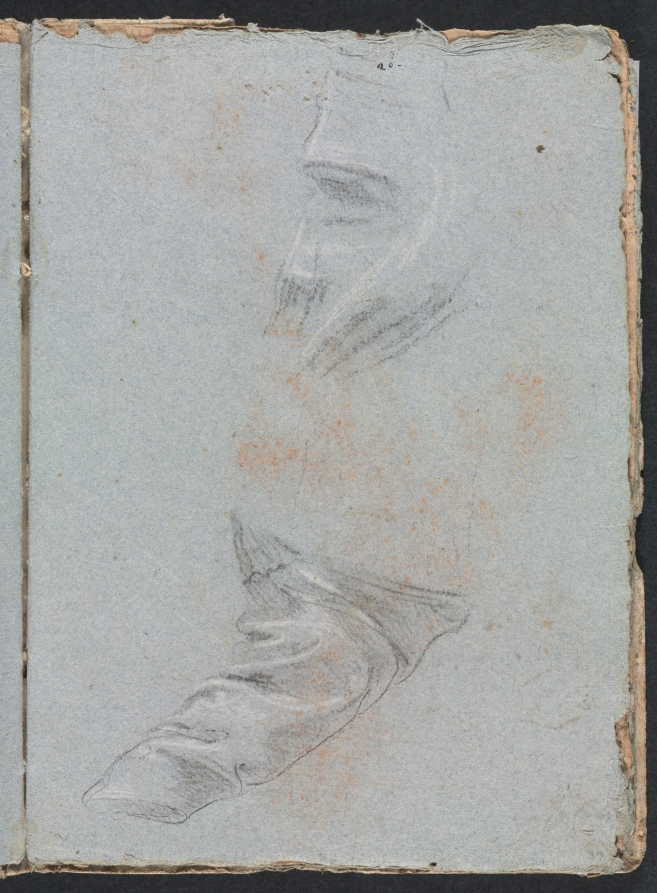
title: Verona Sketchbook: Drapery study (page 39)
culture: Italy, 18th century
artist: Francesco Lorenzi (Italian, 1723–1787)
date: 1760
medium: black chalk with white heightening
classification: Bound Volume